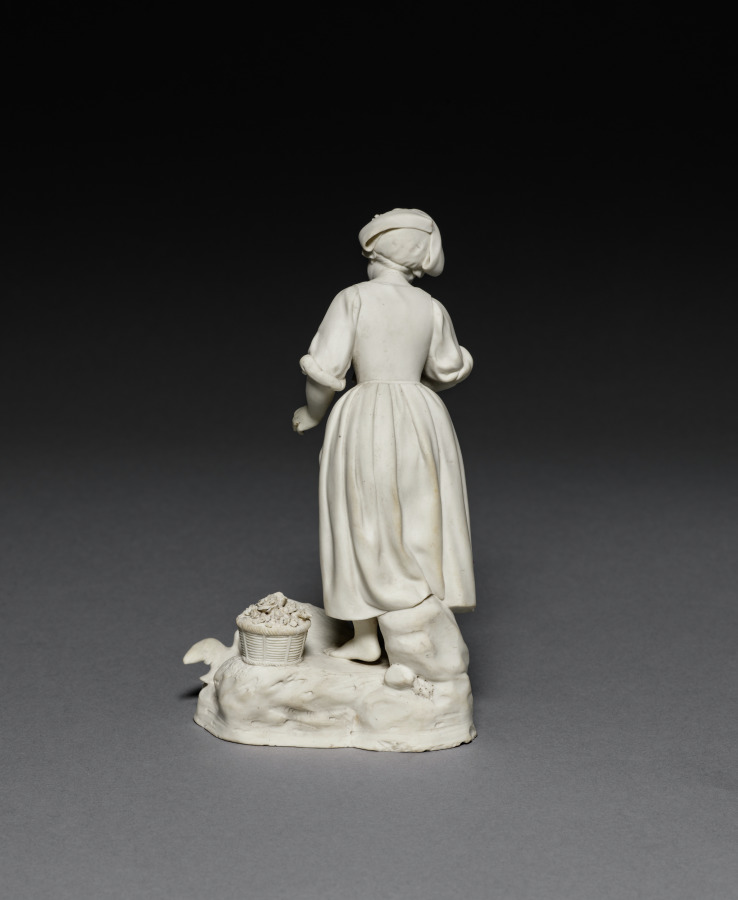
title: Curiosity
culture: France, Lunéville, 18th century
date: c. 1770–1775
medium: pipe clay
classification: Ceramic